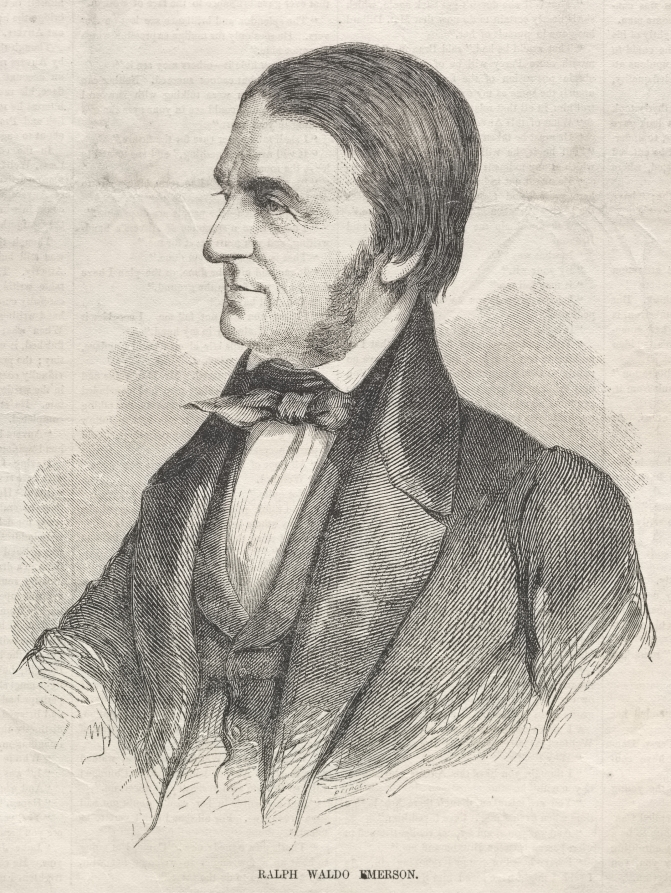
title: Ralph Waldo Emerson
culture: America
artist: Winslow Homer (American, 1836–1910)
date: 1859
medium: wood engraving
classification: Print